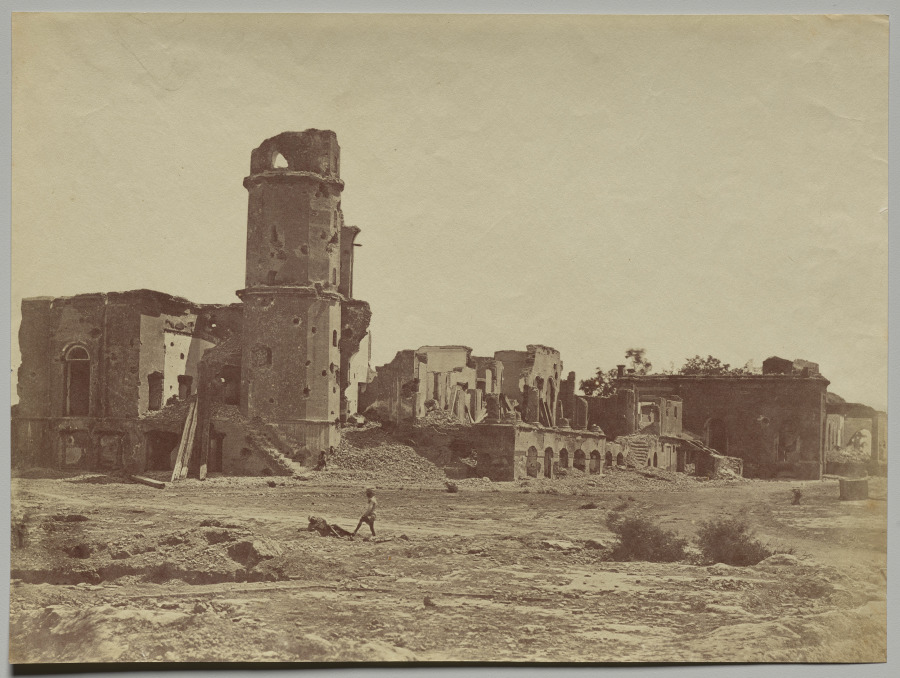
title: The Residency, Taken from the Redan Battery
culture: England, 19th century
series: Lucknow After the Siege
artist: Felice A. Beato (British, 1832–1909)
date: 1858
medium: albumen print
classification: Photograph